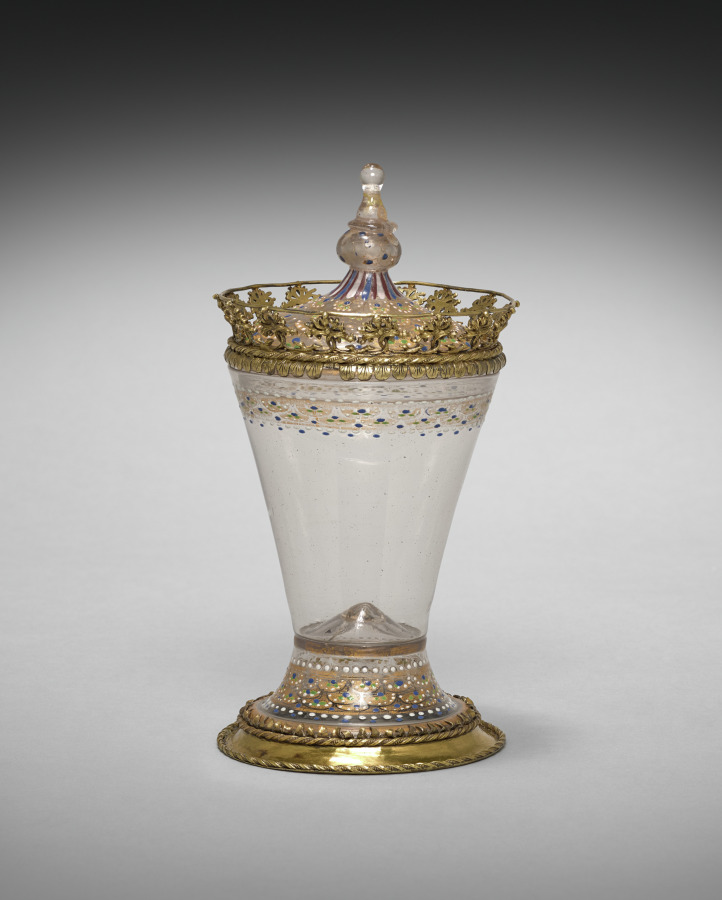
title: Covered Beaker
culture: Italy, Venice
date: c. 1490–1500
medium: glass, enameled and gilded, gilt-silver mounts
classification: Glass